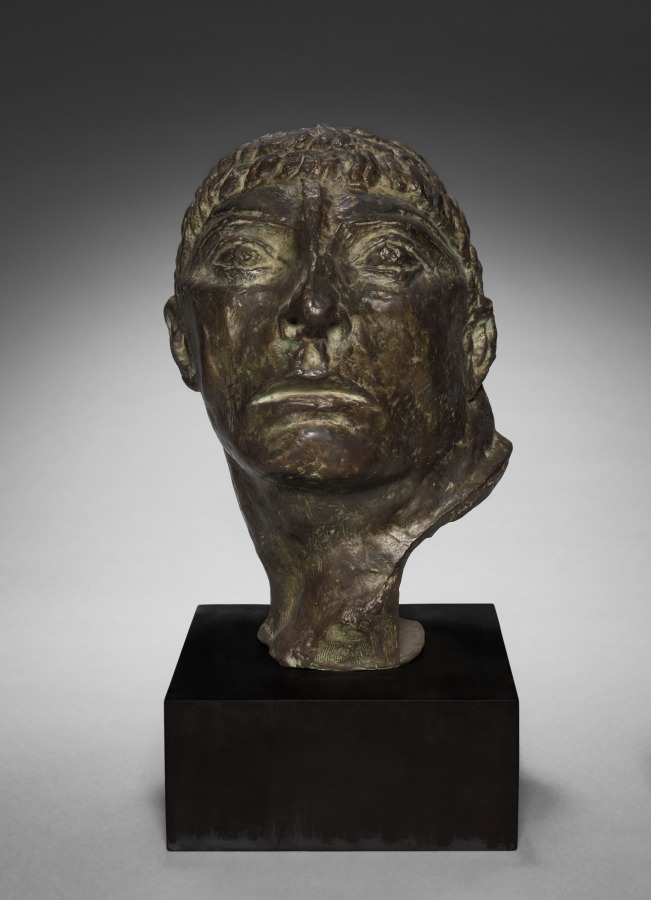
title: Mask of Hercules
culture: France, 20th century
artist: Emile Antoine Bourdelle (French, 1861–1929)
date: 1909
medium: bronze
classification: Sculpture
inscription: Inscribed at neck, lower left: "© Bourdelle"; beneath right ear: "E. Godard/Fondr Paris / 7"